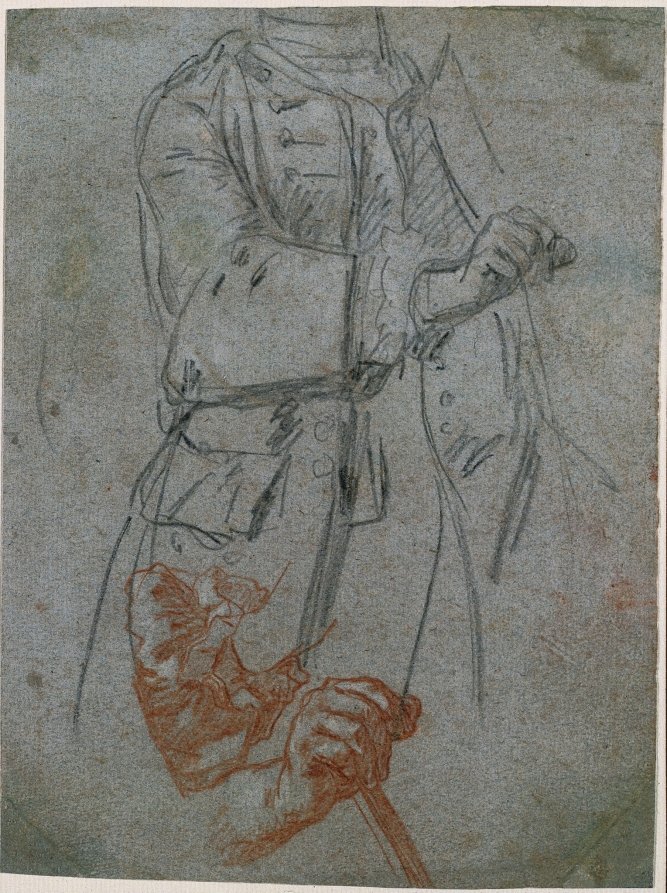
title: Studies of a Costume, Sleeve, and Hand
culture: Italy, 18th century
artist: Pietro Longhi (Italian, 1702–1785)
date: c. 1747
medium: black chalk (costume) and red chalk (sleeve and hand)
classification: Drawing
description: The drawings of the prolific draftsman Pietro Longhi concentrate on the details of costume and gesture to convey the character and social class of his subjects. Here, the artist skillfully exploits black chalk to render the cut of a man’s frock coat and red chalk to simulate the flesh tones of his hand gripping a walking stick.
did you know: Three-piece suits such as the one depicted here were worn all over Europe in the 1700s, with the most expensive made from silk or velvet.